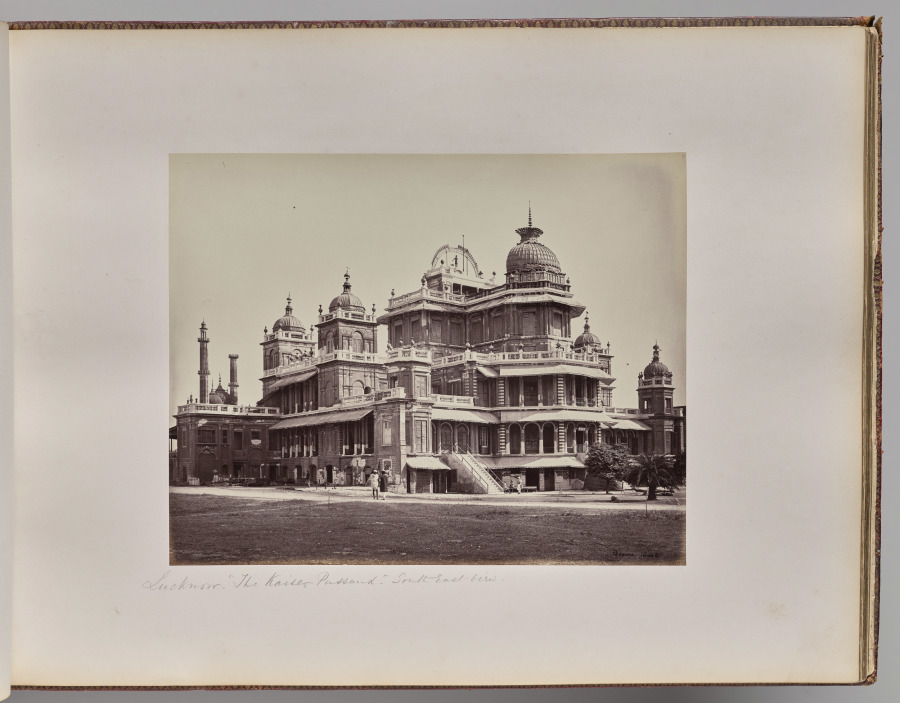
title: Lucknow. The Kaiser Pass and Southeast View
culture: England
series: Photographs of Northern India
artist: Samuel Bourne (British, 1834–1912)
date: 1863–70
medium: albumen print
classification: Photograph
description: The 50 images in this album, all taken in the 1860s, move from the hill towns of the Himalayas down to cities including Lahore (now in Pakistan), Delhi, Lucknow, Agra, Benares (now Varansi), and Calcutta (now Kolkata). Architectural studies of major monuments offer valuable historical records of what sites such as the Taj Mahal and the imperial mosque of the Mughal emperors in Delhi looked like before twentieth-century restorations.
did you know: Samuel Bourne, the author of most the images in this album, was a banker in England before he moved to India to become a professional photographer.